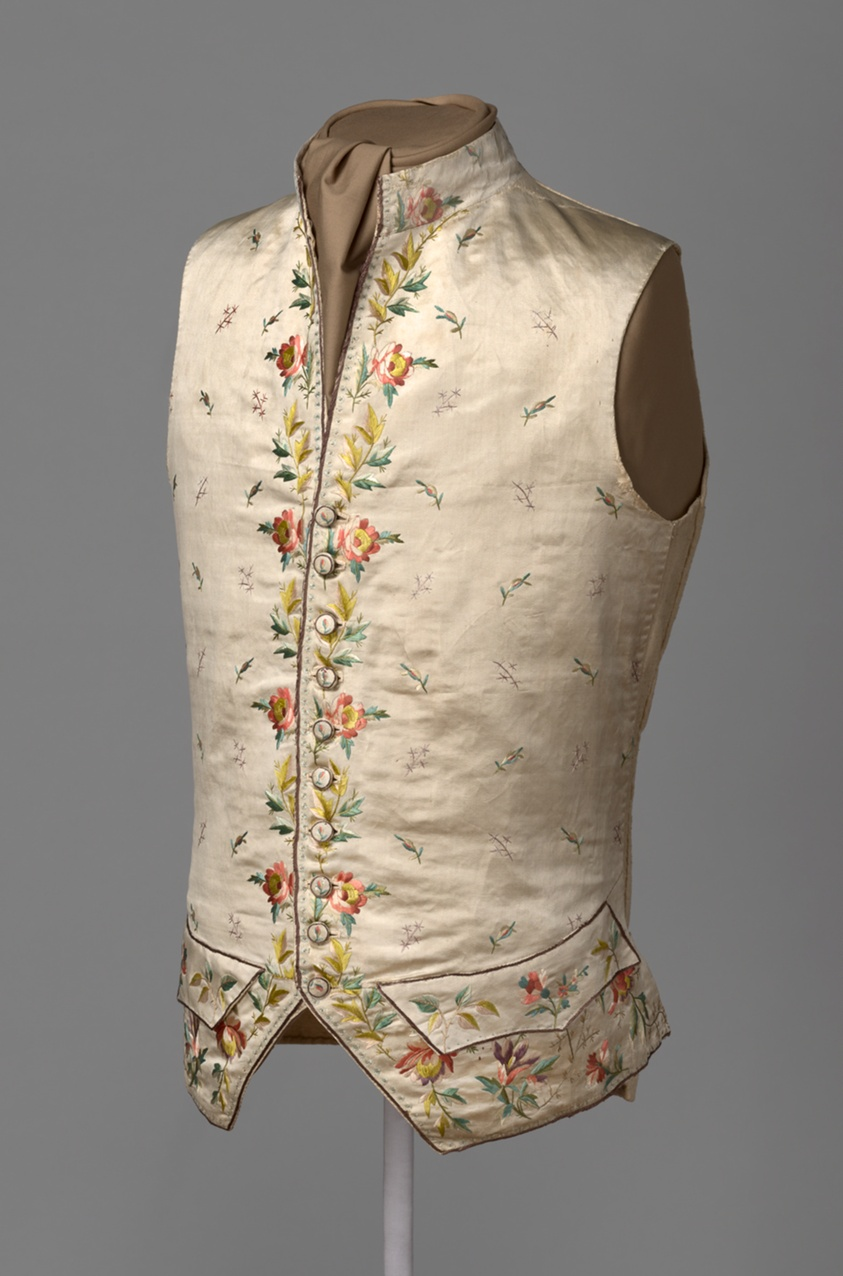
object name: Costume and Accessories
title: Man's Waistcoat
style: 18th Century, Rococo, Neoclassicism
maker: Possibly Lyon, France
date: Embroidered 1780s; altered 1795–1805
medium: Front: Silk, satin-weave foundation, embroidered with silk thread in satin, steam and buttonhole stitches and French knots; embroidered fabric covered buttons; silk, twill weave lining; back: linen, plain weave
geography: France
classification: waistcoat (garment); costume; needlework (visual works); dress (garment); clothing; textile; costume - embroidery; garment; costume - needlework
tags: flowers, roses, fashion, floral, floral motifs